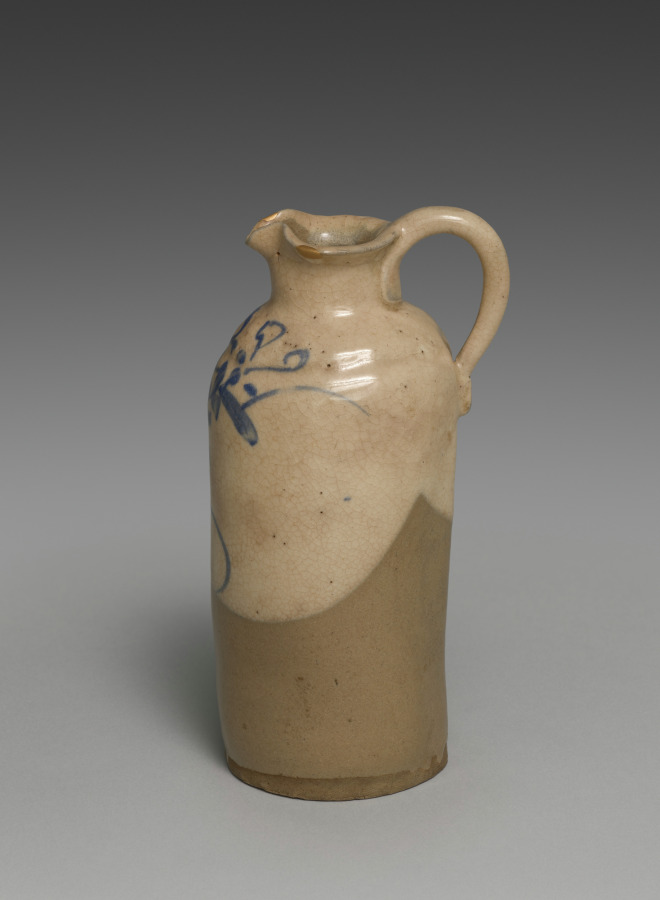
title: Sake Pourer with Bellflowers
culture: Japan, Edo period (1615–1868)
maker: attributed to Seifū Yohei I (Japanese, 1801–1861)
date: c. 1844–57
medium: one of a pair of sake flasks; stoneware with white slip, underglaze blue and gold repair (kintsugi) (Kyoto ware)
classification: Ceramic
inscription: The storage box for the pair of vessels is inscribed and impressed with seals.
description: This pair of sake pourers adorned with with bamboo and bellflowers is attributed to the founder of the Seifū Studio, Seifū Yohei I (1801–1861). Yohei I, the lineage founder, was born to the Yasuda family in the city of Kanazawa, which faces the Sea of Japan. His home province of Kaga (in present-day Ishikawa Prefecture) produced its own ceramics, known as Kutani ware, but for his training as a potter, Yohei I chose Kyoto, which produced the more technically advanced porcelain ware. He moved to Kyoto around the 1820s and became apprenticed to Nin’ami Dohachi, a leading potter in the city. He later struck out on his own, and it is likely that his teacher gave him the name Seifu Yohei. His works include many exquisitely painted copies of Chinese porcelain, and he also produced stoneware with overglaze color enamels that emulated works in the style of Ogata Kenzan (1663–1743) at which his teacher excelled.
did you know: Kintsugi is the Japanese art of repairing broken pottery by mending the areas of breakage with urushi lacquer dusted or mixed with powdered gold.